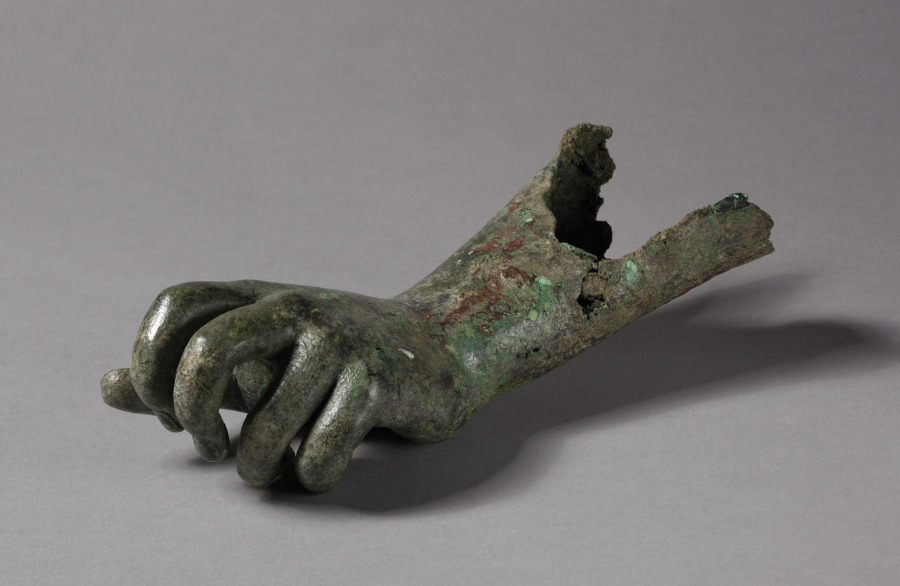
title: Detached Left Forearm and Hand of the Cleveland Apollo: Apollo Sauroktonos (Lizard-Slayer) or Apollo the Python-Slayer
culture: Greece, Athens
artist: attributed to Praxiteles (Greek, Athenian, c. 400–330 BCE)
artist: or Follower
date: c. 350–200 BCE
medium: bronze, copper and stone inlay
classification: Sculpture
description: Broken from the rest of the left arm some distance above the wrist, this fragment preserves much of the left forearm and the entire hand. The fingernails and folds of the palm are finely modeled, giving the hand a lifelike appearance. The positioning of the fingers and thumb suggests that the hand once gently grasped something, perhaps a slender branch of the now-lost tree.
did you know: The thumb and fingers are solid bronze, while the rest of this section is hollow.